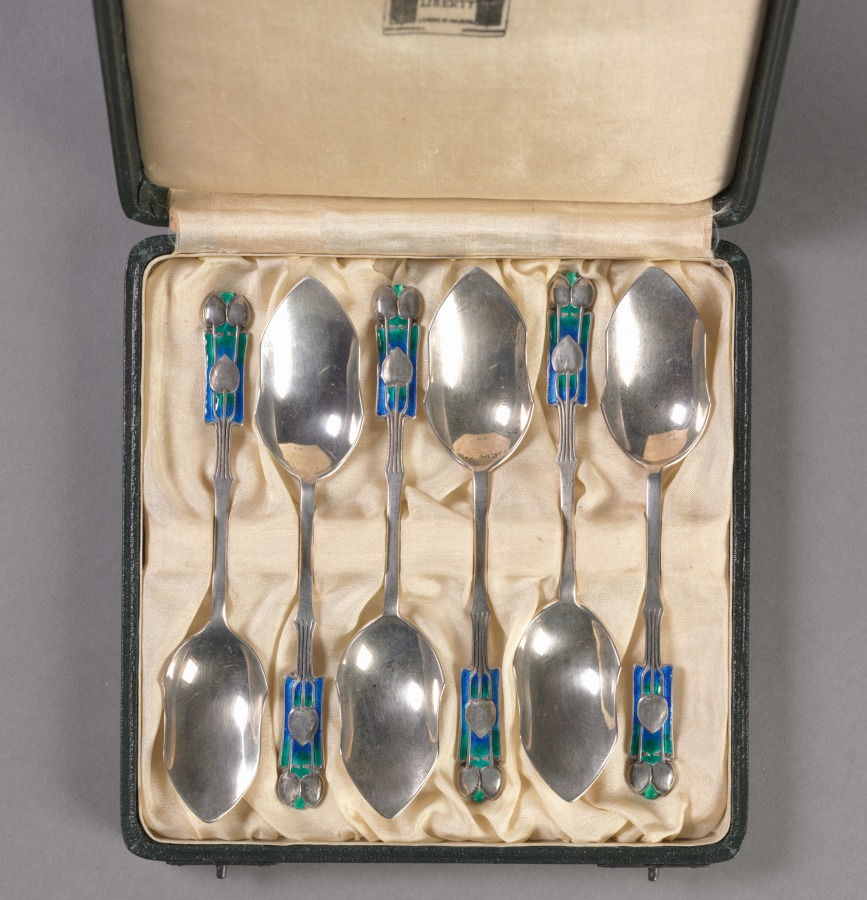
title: Set of six Spoons in Original Box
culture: England, London, 19th century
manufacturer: Liberty and Company (British)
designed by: attributed to Archibald Knox (British, 1864–1933)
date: c. 1895–1910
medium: Silver, enamel decoration and leather box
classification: Silver